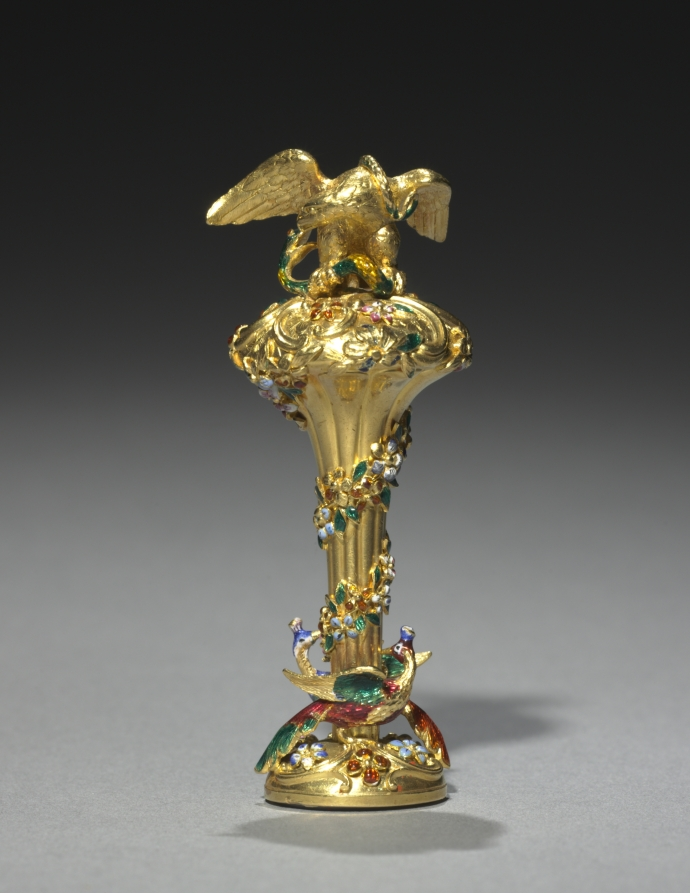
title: Hand Seal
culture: Russia, St. Petersburg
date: c. 1839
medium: gold with transparent enamels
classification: Miscellaneous